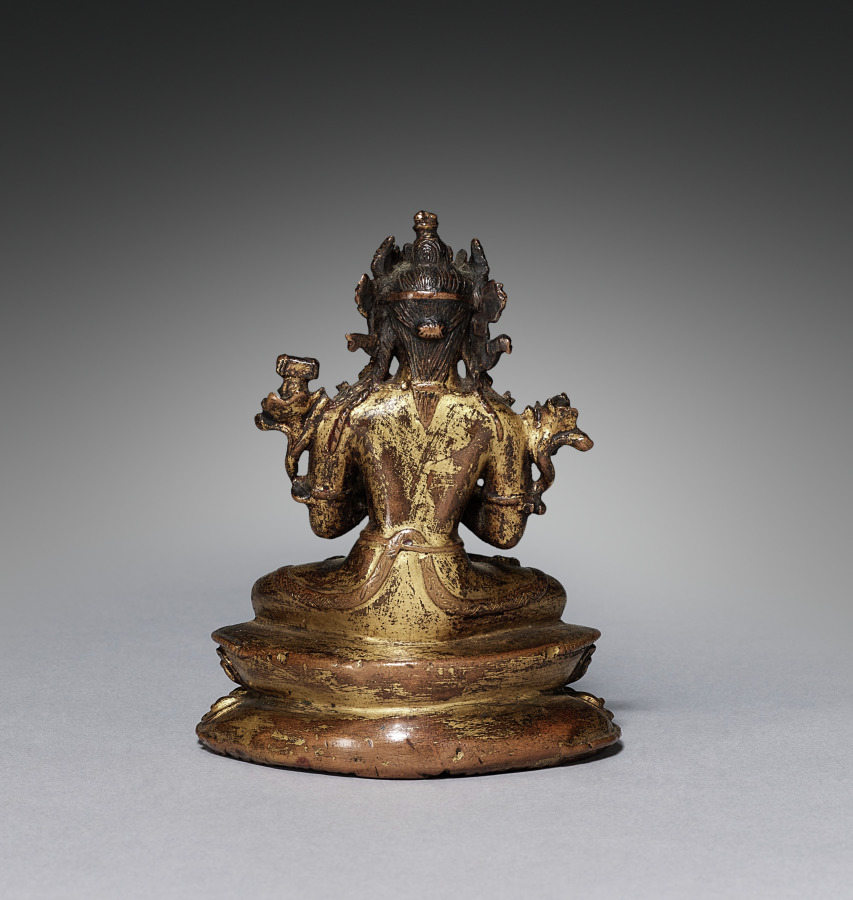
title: Manjuvara Turning the Wheel of the Law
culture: Nepal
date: 1300s–1400s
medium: gilded copper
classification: Sculpture